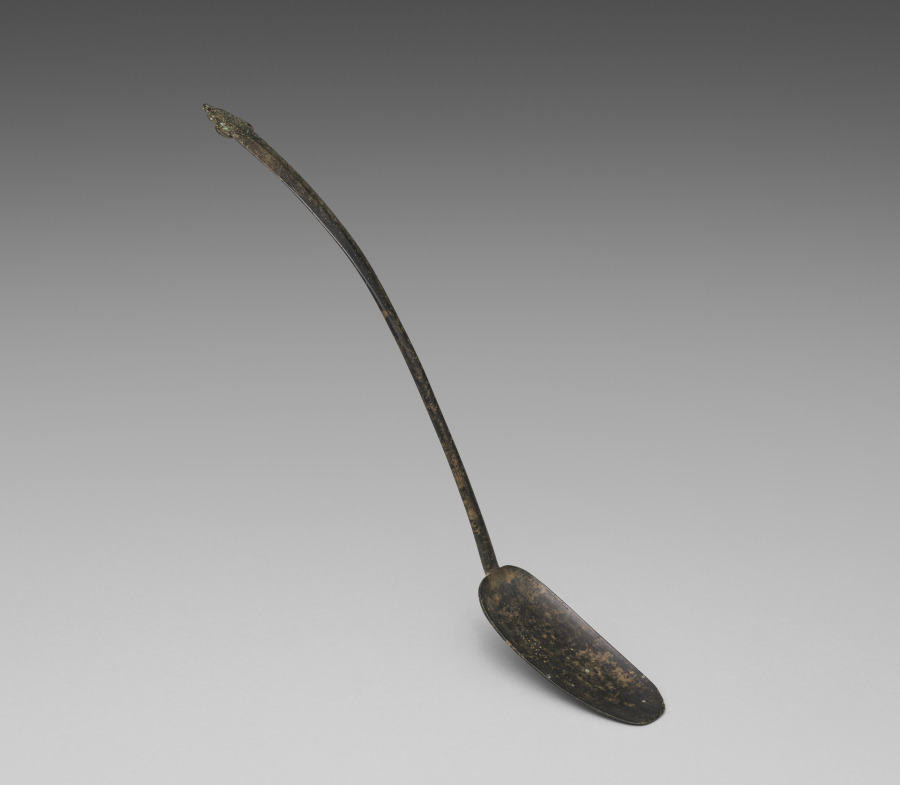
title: Spoon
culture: Korea, Goryeo dynasty (918–1392)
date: 918–1392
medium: silver bronze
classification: Metalwork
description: Celadons, spoons, seals, and bronze mirrors were among the most common burial objects of the Goryeo dynasty (918–1392), placed in tombs to honor and comfort the deceased. This spoon, with its gracefully curved bowl and handle that bends downward to each side, ending in a scepter-shaped finial, is distinctive in design and was likely used in Buddhist rituals, rather than as an everyday utensil.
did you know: Scholars have proposed that toward the end of the 1300s, Koreans enjoyed meat-based soups more than any other dishes, explaining why spoons became common household items as well as burial goods.